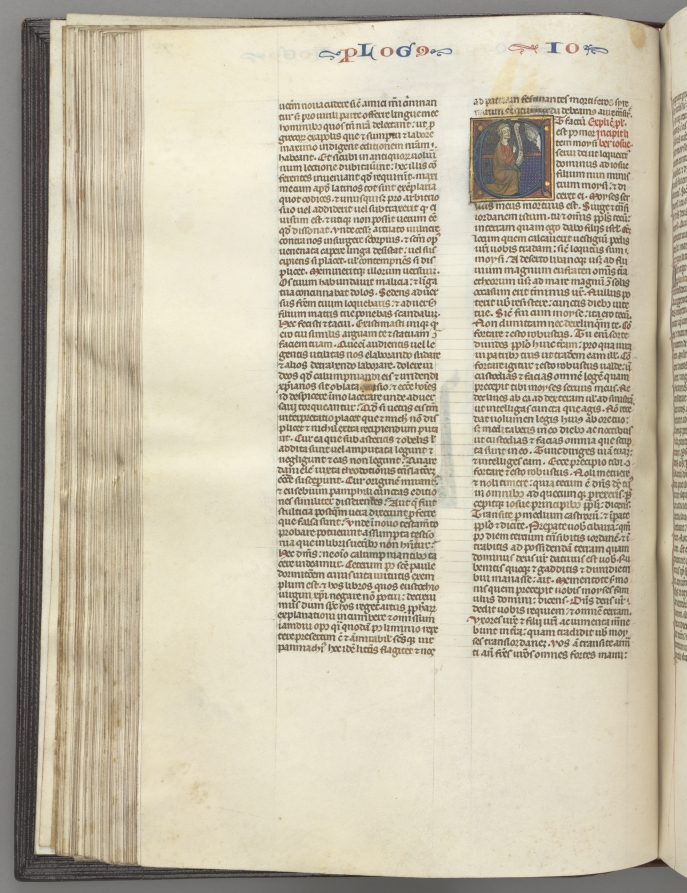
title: Fol. 76v, Joshua, historiated initial E, Joshua with a scroll kneeling before God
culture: Southern France, Toulouse(?), 13th century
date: c. 1275–1300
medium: ink, tempera, and gold on vellum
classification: Bound Volume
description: Biblical manuscripts were highly prized and important possessions of churches, monasteries, cathedral schools, and universities throughout medieval Europe. The biblical texts were known as the vulgate, the translations made by Saint Jerome in the fourth century from Hebrew and Greek into Latin, which became the definitive and official Latin version of the Roman Church. In the 13th century, the bible was, for the first time, produced as a single volume with an officially sanctioned sequence to its books and chapters as illustrated by this example. The very extensive decoration of this bible is arranged hierarchically to indicate the relative importance of the various texts so that full or almost full-page initials mark the openings of the first prologue, Genesis, and the first Gospel; historiated initials mark the beginning of each book and illuminated initials mark the Prologues.